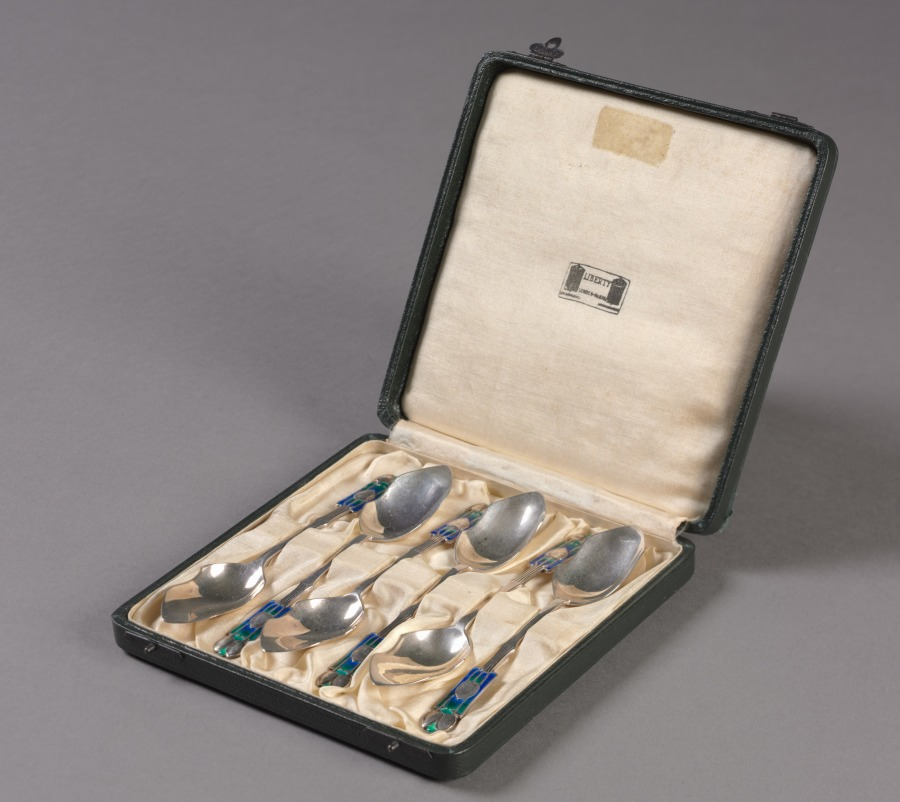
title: Set of six Spoons in Original Box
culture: England, London, 19th century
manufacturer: Liberty and Company (British)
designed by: attributed to Archibald Knox (British, 1864–1933)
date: c. 1895–1910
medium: Silver, enamel decoration and leather box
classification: Silver